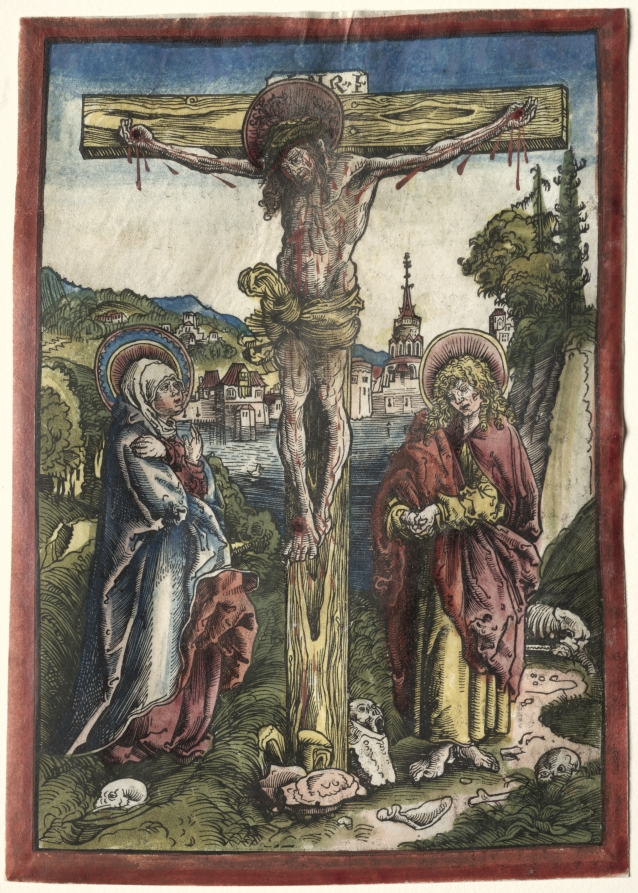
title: Christ on the Cross between the Virgin and Saint John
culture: Germany, early 16th Century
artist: Lucas Cranach (German, 1472–1553)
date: 1503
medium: woodcut on vellum, hand colored with watercolor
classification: Print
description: The first carved woodblocks were printed on textiles or vellum until about 1400, when the supply of paper became more abundant.